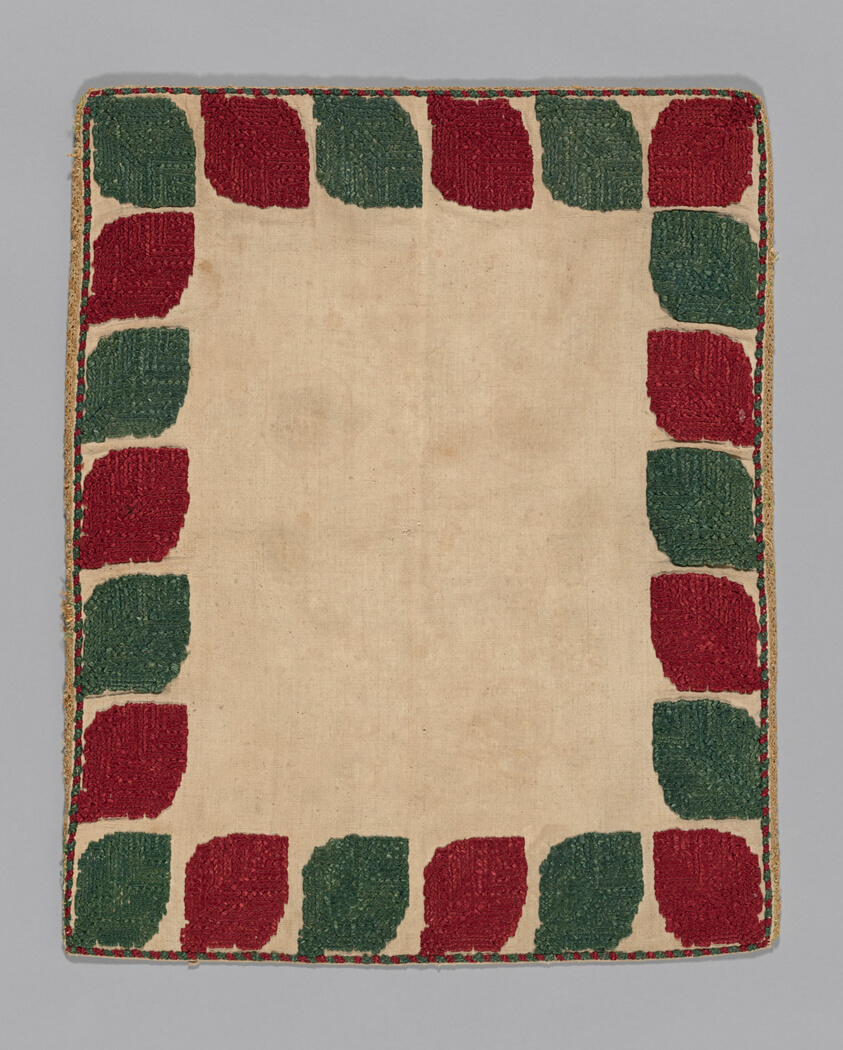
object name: Textile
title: Pillow Cover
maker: Rhodes, Dodecanese Islands, Greece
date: 17th/18th century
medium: Linen, plain weave; embroidered with silk in cross and four-sided stitches; joined with silk, needle-made oblique interlacing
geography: Ródhos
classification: textile; needlework (visual works)